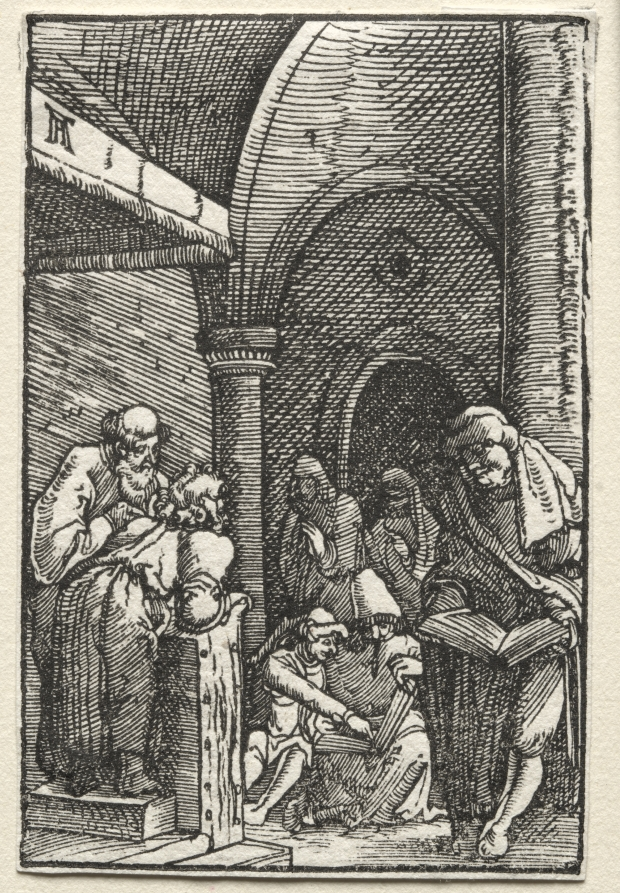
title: The Fall and Redemption of Man: Christ Disputing with the Doctors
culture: Germany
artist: Albrecht Altdorfer (German, c. 1480–1538)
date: c. 1515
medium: woodcut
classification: Print